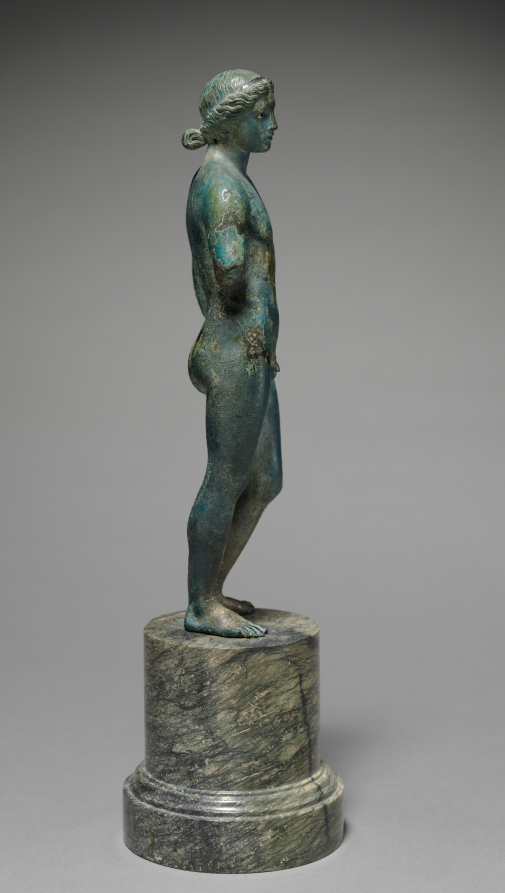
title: Athlete or Apollo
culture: Greece, Macedonia(?)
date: probably 100–1 BCE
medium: bronze with silver inlays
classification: Sculpture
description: This bronze statuette depicts a nude male, perhaps a young athlete or the youthful god Apollo. The figure is made from solid bronze, with a fillet of inlaid silver on his head. The figure’s right arm is broken off just above the elbow. If this is a statue of Apollo, he may have once held a bow and arrow; if it depicts an athlete, he could have held athletic equipment, a symbol of victory, or an offering dish.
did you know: The eyes of this figure are decorated with inlaid silver.